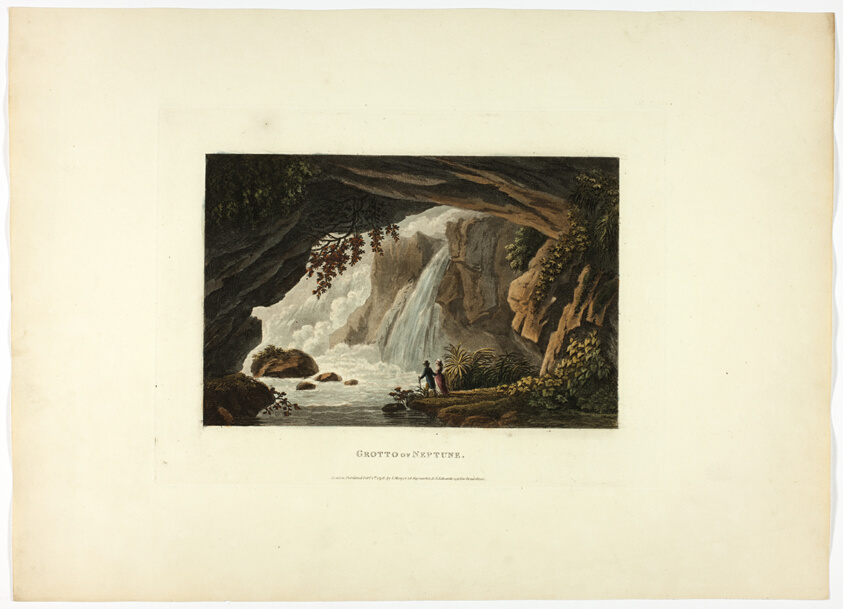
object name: Print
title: Grotto of Neptune, plate twenty-three from the Ruins of Rome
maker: M. Dubourg, (English, active 1786-1838); published by J. Merigot (Italian, Unknown)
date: published February 1, 1798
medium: Hand-colored aquatint on paper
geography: England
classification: aquatint; print; prints and drawing